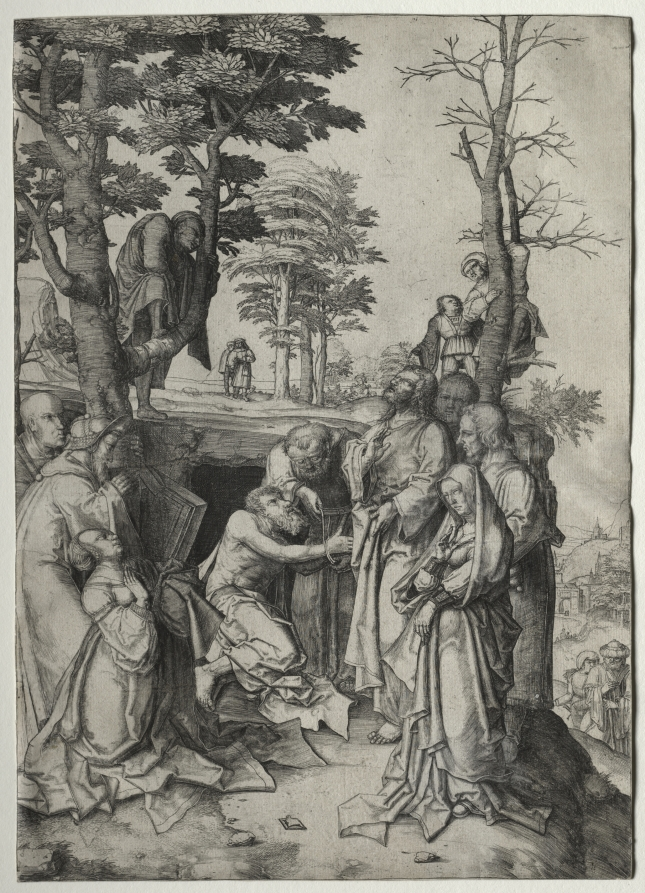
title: The Raising of Lazarus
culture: Netherlands, 16th century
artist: Lucas van Leyden (Netherlandish, 1494–about 1533)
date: by 1508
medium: engraving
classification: Print